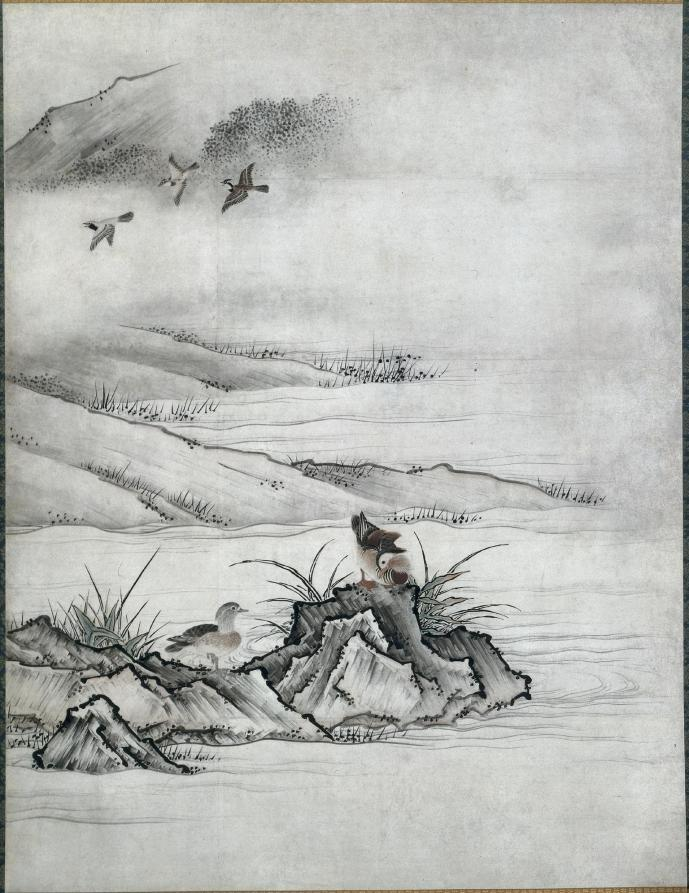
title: Flowers and Birds in a Spring Landscape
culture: Japan, Muromachi period (1392–1573)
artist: attributed to Kano Motonobu (Japanese, c. 1476–1559)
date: 1500s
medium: One of a set of sliding door panels mounted as hanging scrolls; ink and color on paper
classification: Painting